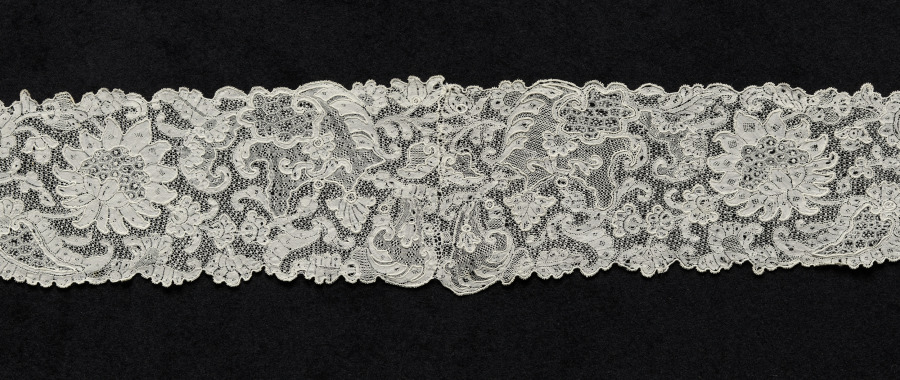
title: Lace Lappet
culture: France, Alençon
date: 1730s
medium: Linen: needle lace (Point d'Alençon)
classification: Lace